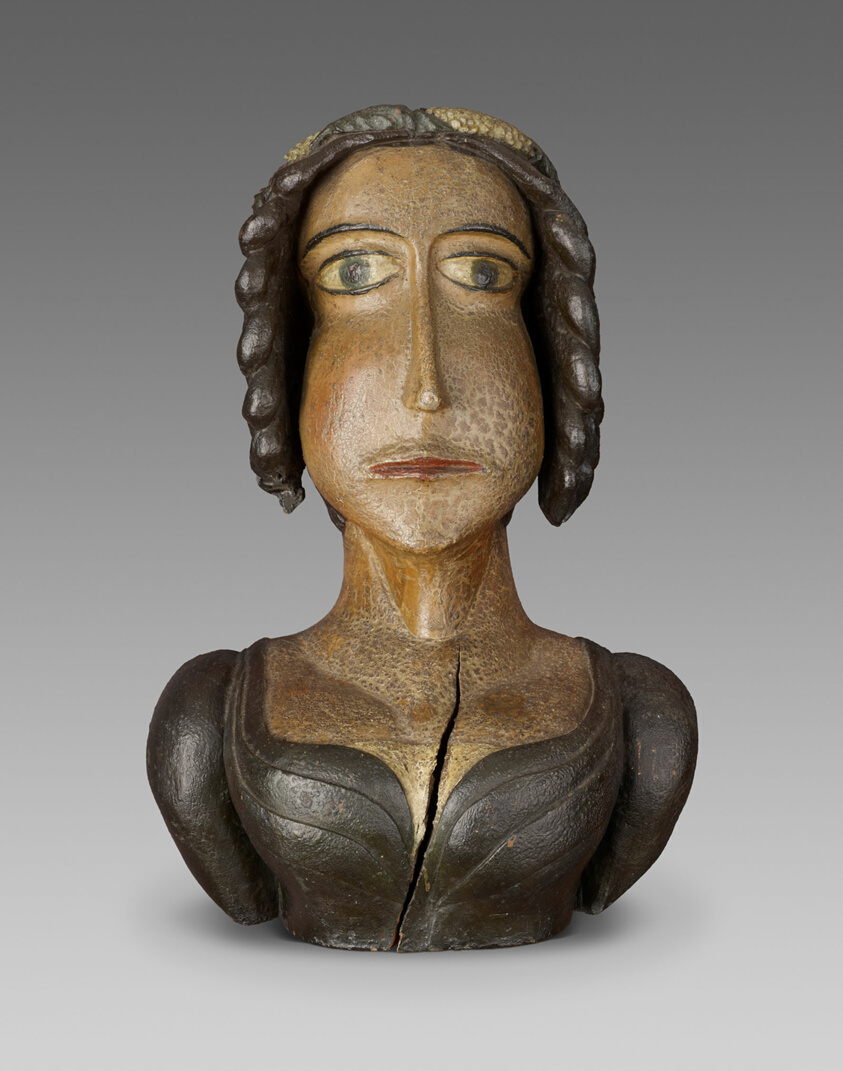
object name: Decorative Arts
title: Female Bust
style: Folk Art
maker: Artist unknown (American, 19th century); Northeast coast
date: 1800–30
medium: White pine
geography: Northeast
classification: sculpture; american decorative arts; american arts; decorative arts